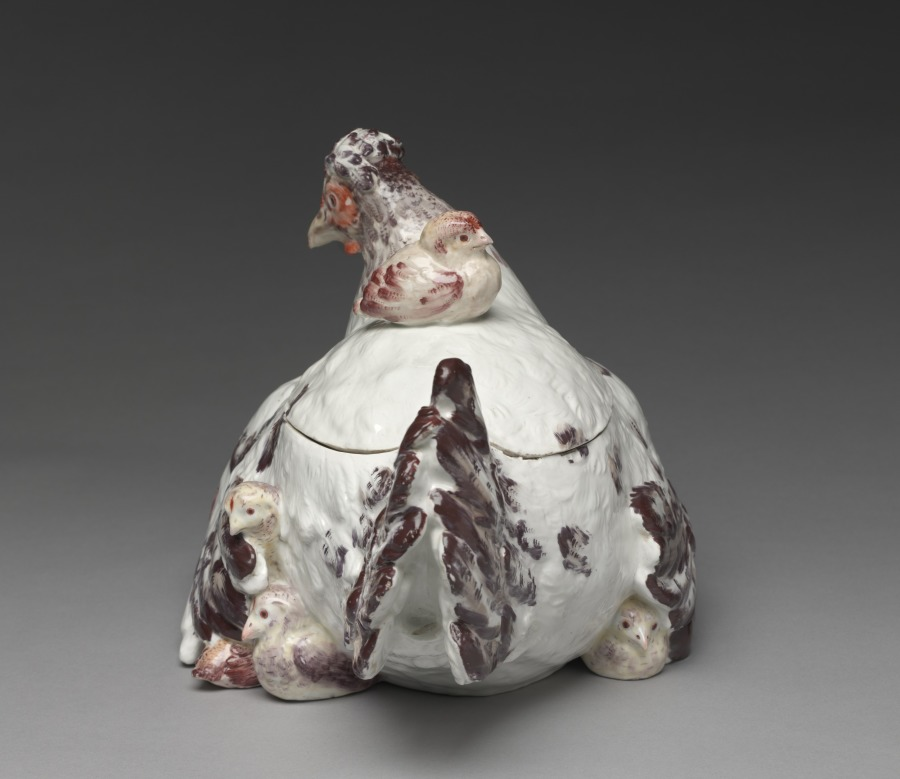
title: Hen and Chicks Covered Tureen on Stand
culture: England, London, Chelsea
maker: Chelsea Porcelain Factory (Britain, London, 1745–84)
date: c. 1755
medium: soft-paste porcelain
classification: Ceramic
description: The ceramic factory at Chelsea, located along the river Thames in western London, was Britain’s most renowned factory of decorative porcelain in the mid-1700s. Large tureens in the form of chickens or rabbits appealed to wealthy aristocrats, who took great care in developing specimen animal and poultry breeds on their country estates. The design for this particular tureen was taken from a popular seventeenth-century print by Francis Barlow depicting a farmyard.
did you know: Though the form of a soup tureen suggests a functional role at the dining table, such large, expensive porcelains were probably only used for decoration because hot liquids might have easily caused them to crack.